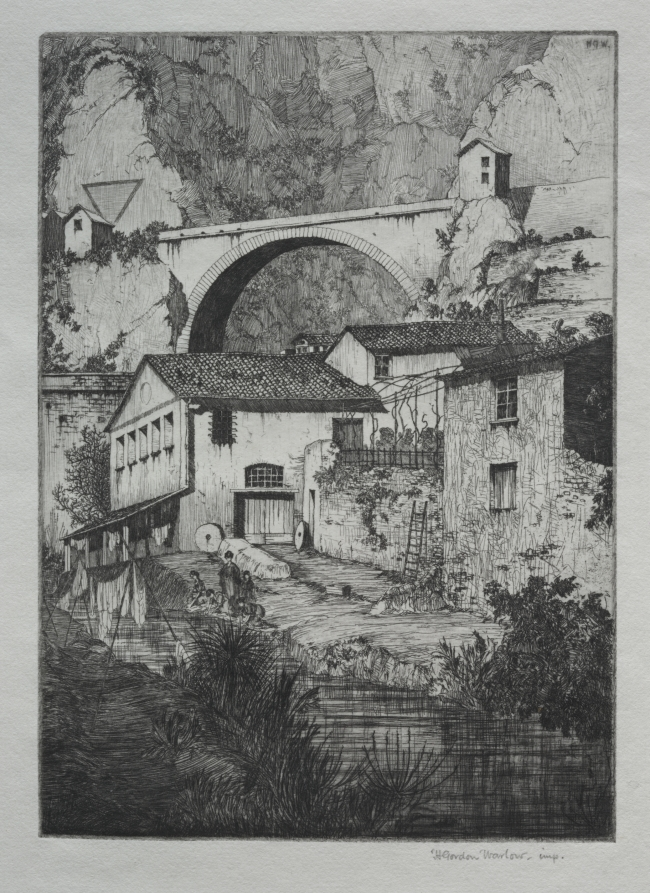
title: Pont St. Louis, Manton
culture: England, 20th century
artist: Herbert Gordon Warlow (British, 1885–1942)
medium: drypoint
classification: Print